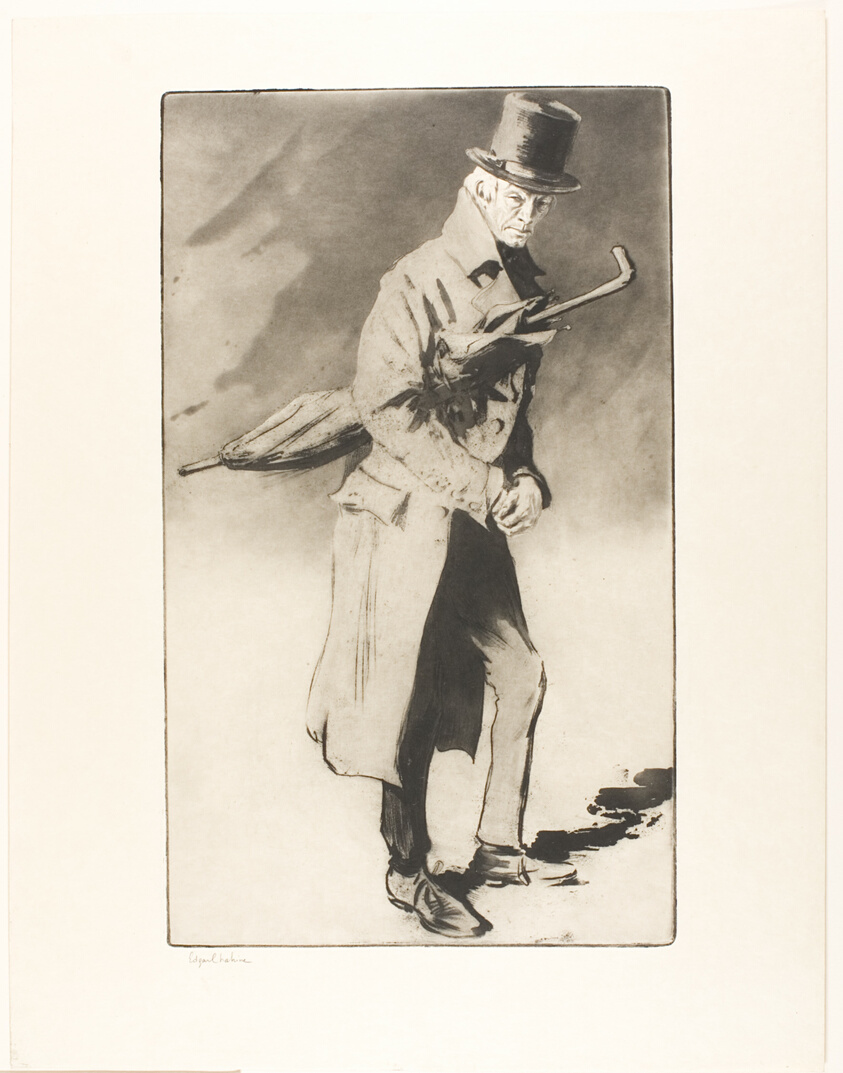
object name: Print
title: Lerand in the Role of "Rodin" in The Wandering Jew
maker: Edgar Chahine (French, 1874-1947)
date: 1903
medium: Etching, drypoint, and aquatint on cream wove paper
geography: France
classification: aquatint; print; prints and drawing